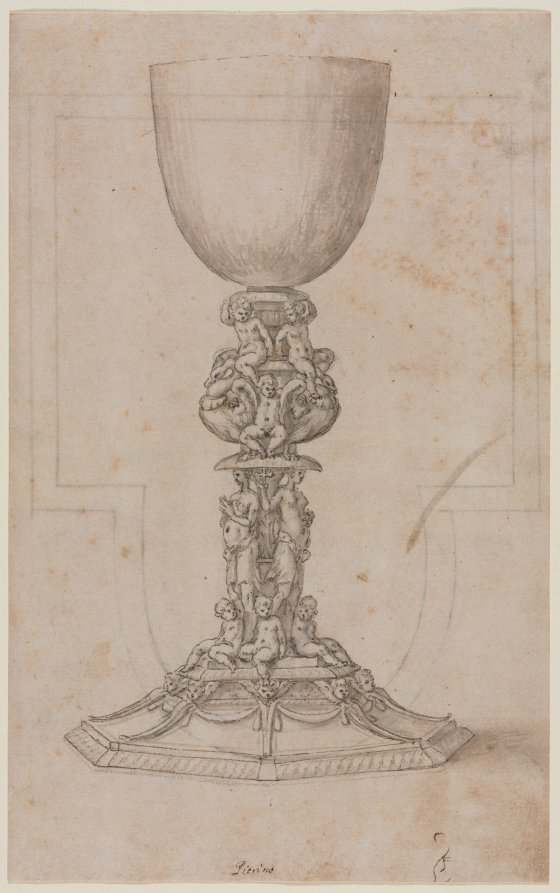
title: Design for a Chalice (recto)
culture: Italy, 16th century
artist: Luzio Romano (Italian, active 1528–75)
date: mid-1500s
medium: Black chalk, pen and brown ink, and brown wash, over black chalk, on laid paper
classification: Drawing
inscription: lower center, in brown ink: Pierino ; VERSO OF SECONDARY SUPPORT, lower center, in graphite: A 3089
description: An assistant to influential Renaissance designer Perino del Vaga (1501–1547), Luzio Romano is known primarily through the drawings he made for liturgical objects (objects used for public worship), such as this chalice, likely a goldsmith’s design. The foot is decorated with seraphim—the highest order of angels—and nude children below figures of women and pelicans on the base of the bowl, which together allude to the theological virtue of charity. A pelican piercing its breast to feed its young with its blood is also a symbol of Christ’s sacrifice on the cross, fitting for a vessel meant to hold the eucharistic wine.